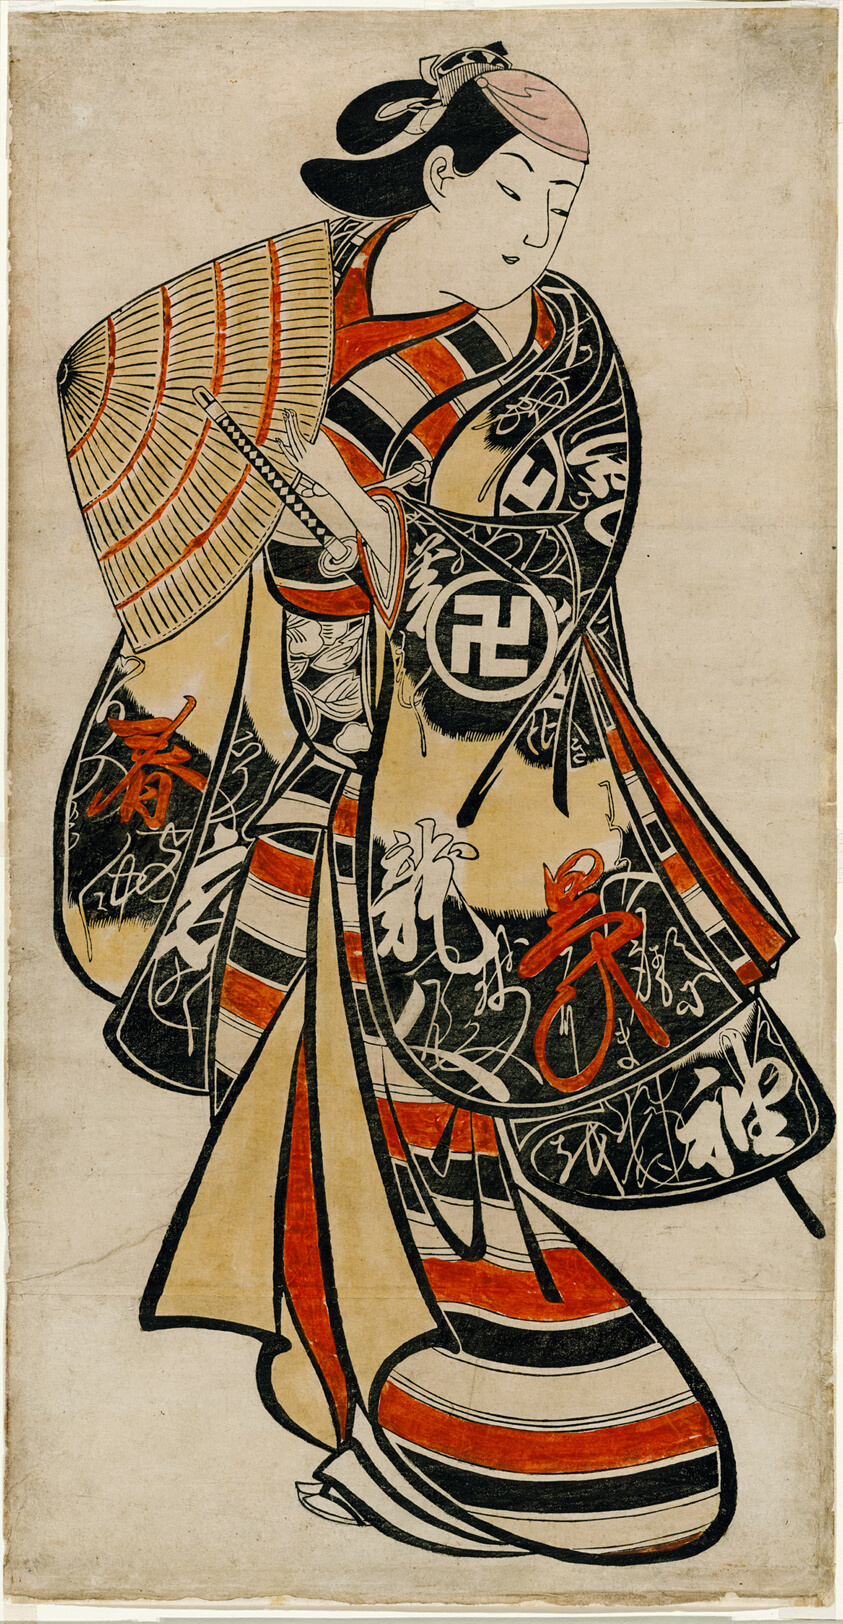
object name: Print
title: The Actor Takii Hannosuke as an effeminate youth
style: Japanese (culture or style)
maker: Attributed to Torii Kiyonobu I; Japanese, 1664-1729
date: c. 1707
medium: Hand-colored woodblock print; tan-e, vertical o-oban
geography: Japan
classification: woodblock print; print; asian art